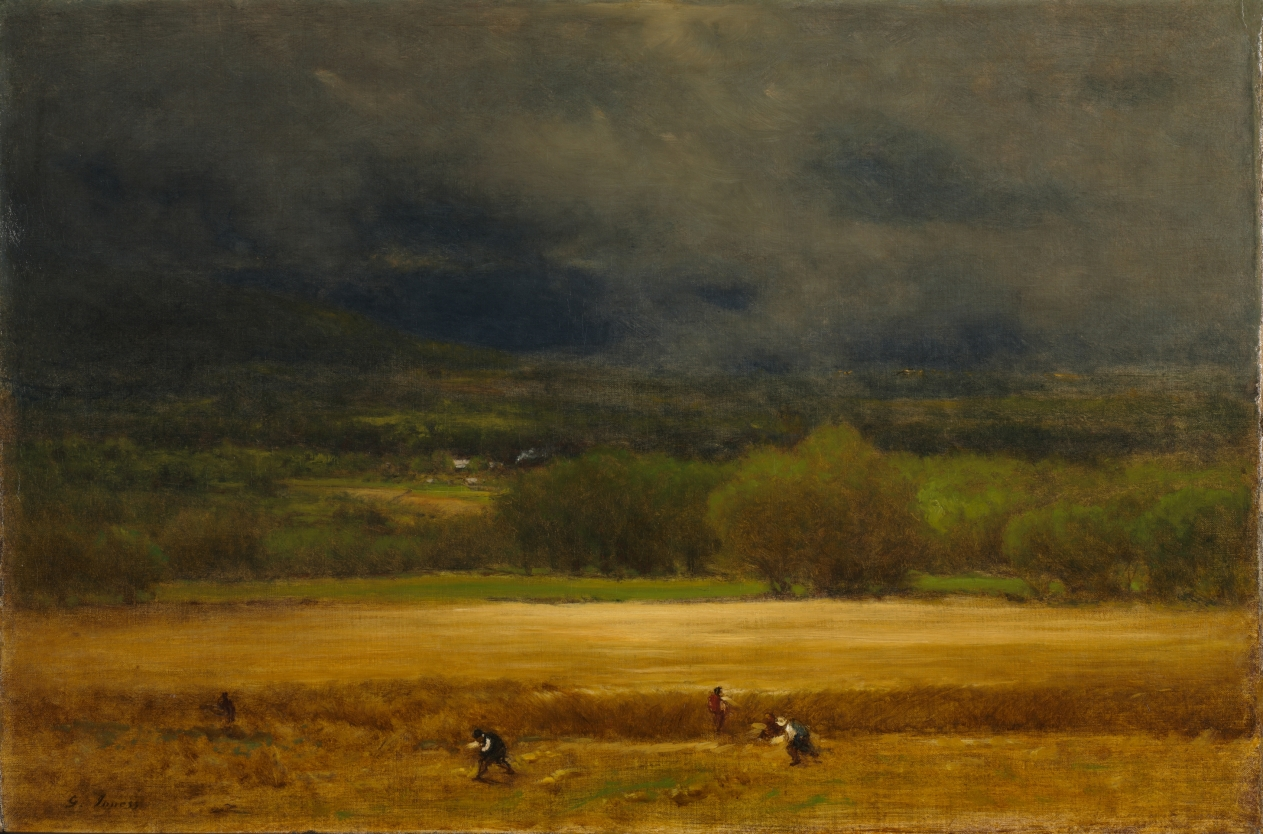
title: The Wheat Field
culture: America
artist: George Inness (American, 1825–1894)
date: c. 1875–77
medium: oil on canvas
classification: Painting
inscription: Signed lower lert: "G. Inness"